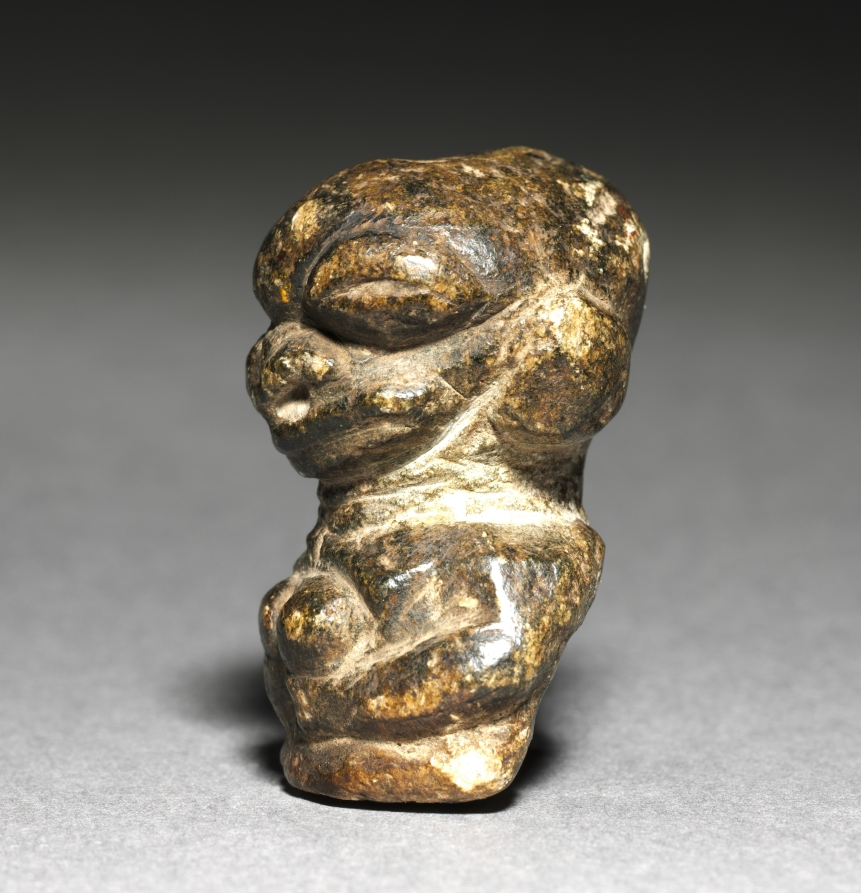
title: Female Figure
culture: Africa, West Africa, Sierra Leone, Sherbro Island, unknown maker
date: 1500s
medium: soapstone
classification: Sculpture